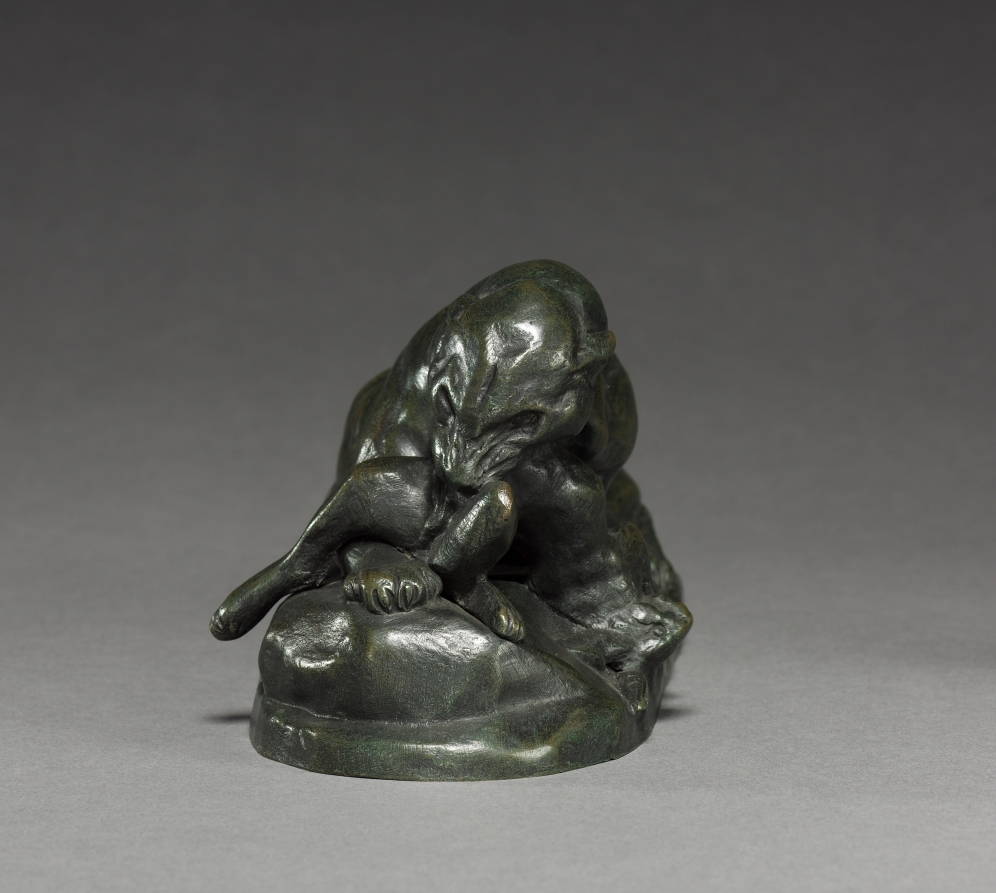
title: Jaguar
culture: France, 19th century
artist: Antoine-Louis Barye (French, 1796–1875)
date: c. 1850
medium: bronze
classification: Sculpture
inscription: On base, back of left hind leg: (L?). Barye"